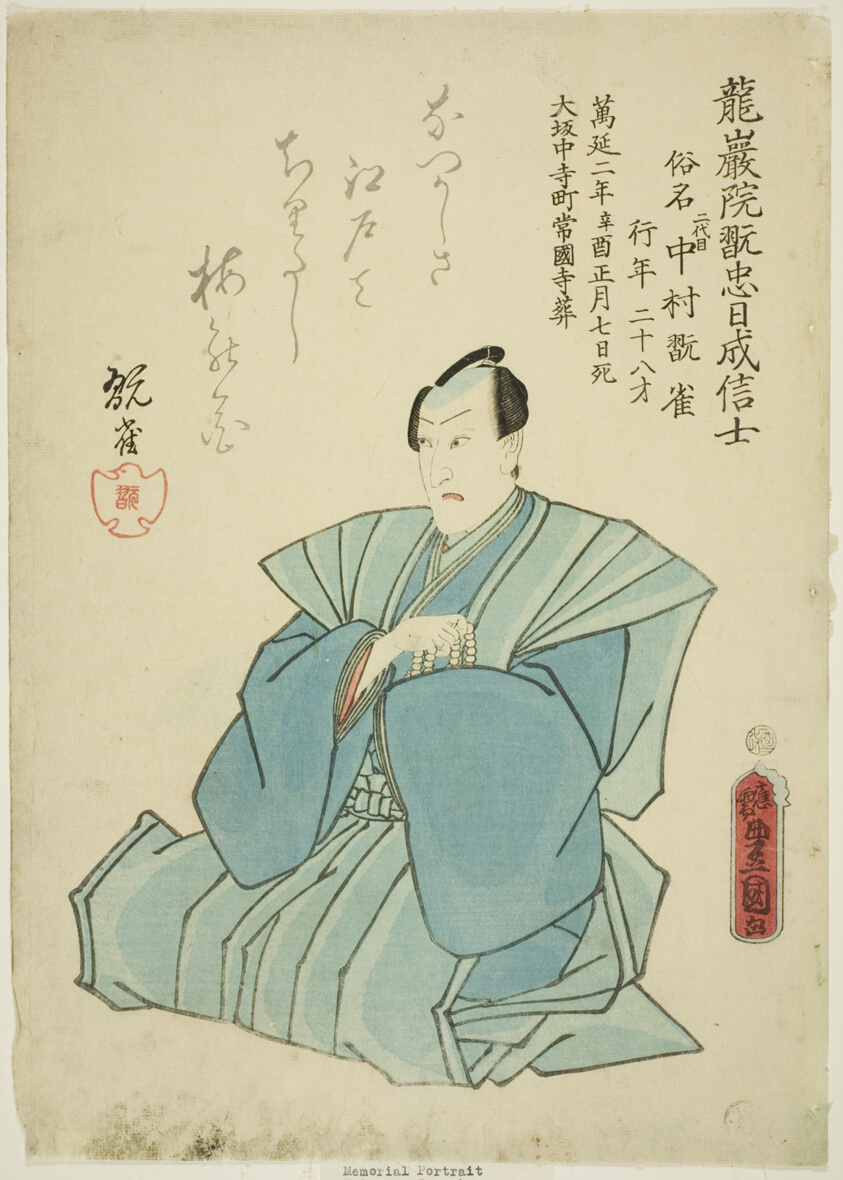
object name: Print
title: Memorial Portrait of the Actor Nakamura Kanjaku II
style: Japanese (culture or style)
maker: Utagawa Kunisada I (Toyokuni III) (Japanese, 1786-1864)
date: 1861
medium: Color woodblock print; oban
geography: Japan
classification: print; asian art